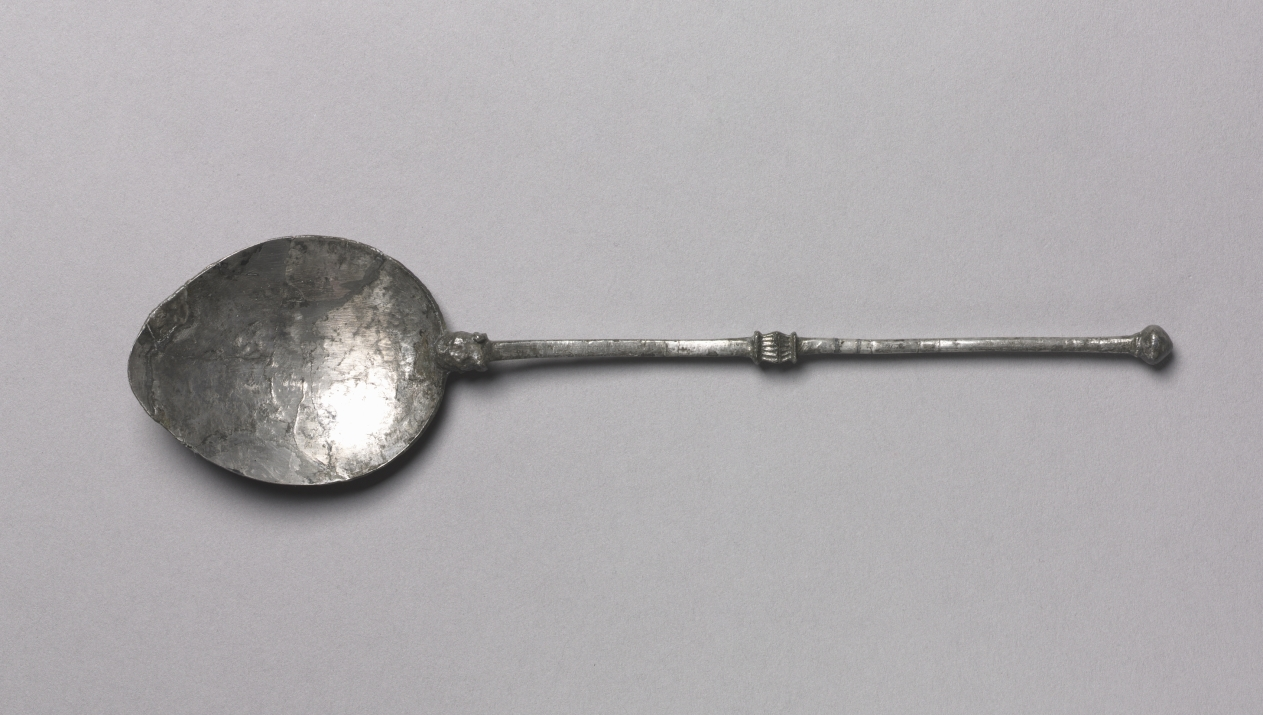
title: Spoon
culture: Byzantium, Syria(?), Byzantine period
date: 300s CE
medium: silver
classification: Metalwork